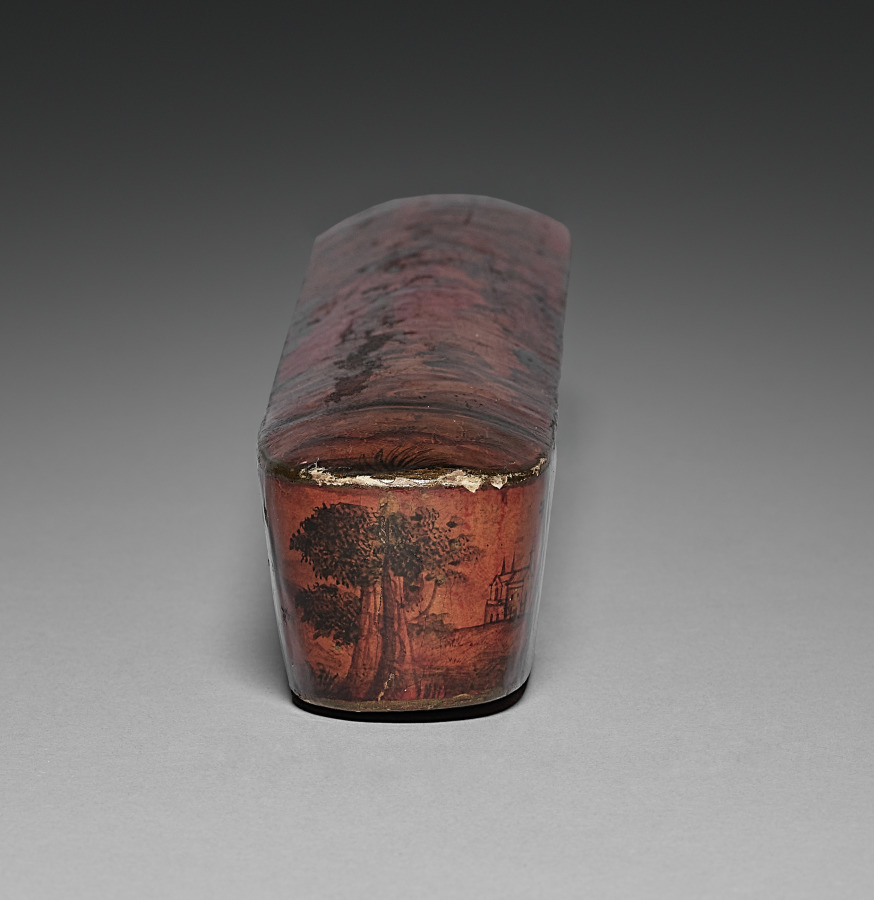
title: Pen and Ink Box (lid)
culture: Iran, Qajar period (1779-1925)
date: 1800s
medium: lacquer over papier maché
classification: Lacquer